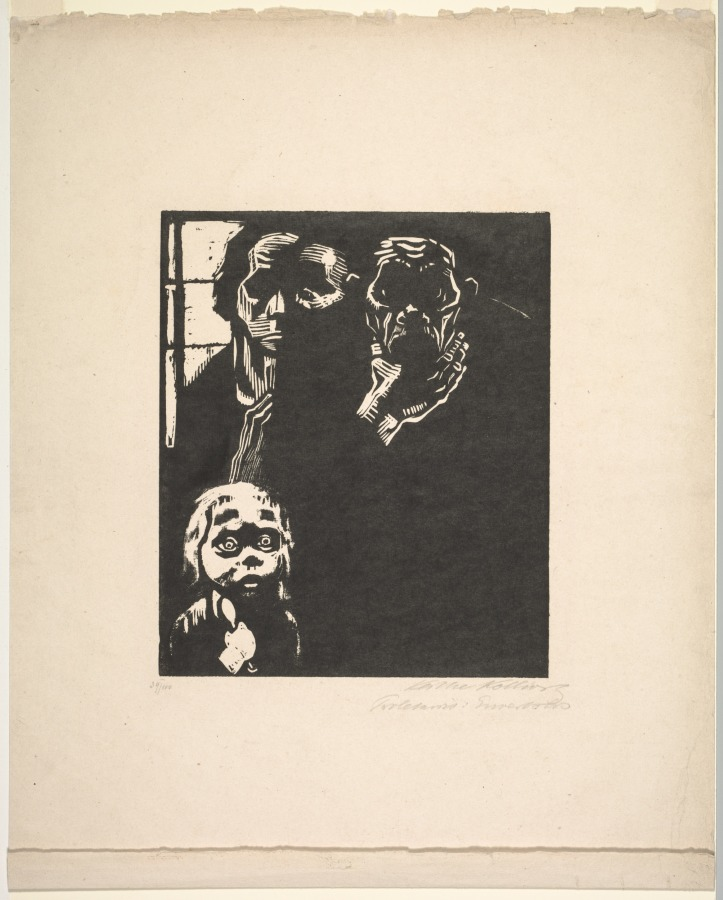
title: Proletariat: No. 1 Out of Work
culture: Germany, 20th century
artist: Käthe Kollwitz (German, 1867–1945)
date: 1925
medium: woodcut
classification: Print